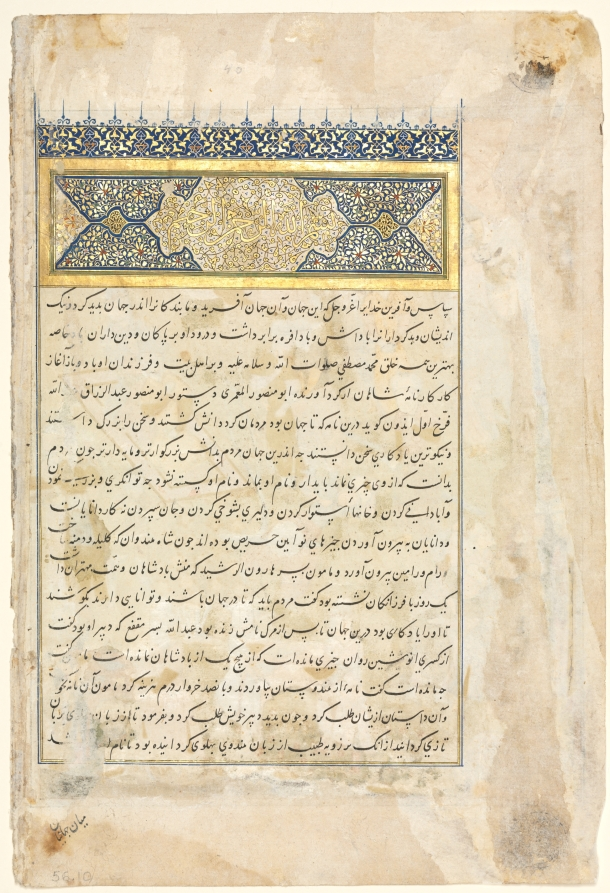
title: Preface (verso) from a double-page frontispiece of a Shahnama of Firdausi (940-1019 or 1025)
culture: Iran, Shiraz, Timurid period (1370-1501)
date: c. 1444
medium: opaque watercolor, ink, and gold on paper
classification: Manuscript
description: This text page is the first page of a Shahnama manuscript with an illuminated heading containing the basmala ("In the name of Allah, etc.") followed by the text of the preface to the Shahnama.